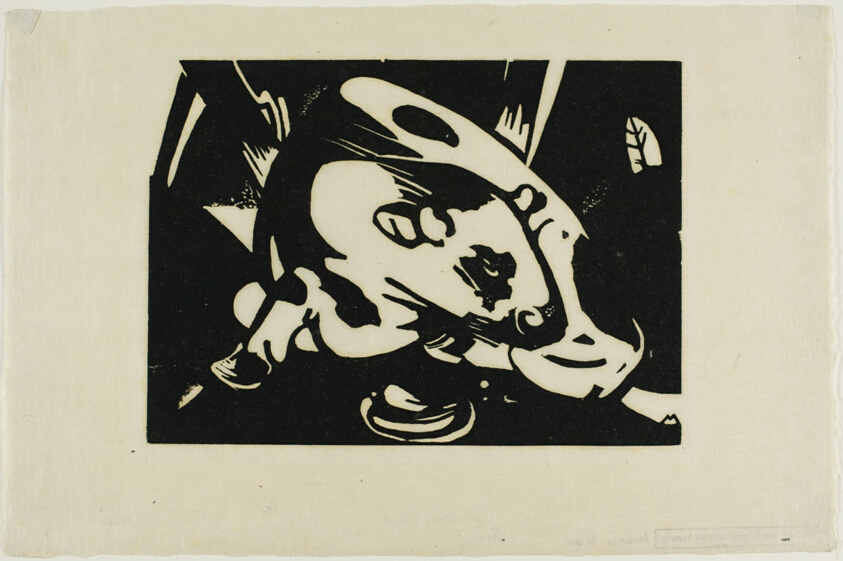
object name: Print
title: The Bull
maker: Franz Marc (German, 1880-1916)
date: 1912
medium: Woodcut on ivory wove Japanese paper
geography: Germany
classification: woodcut; print; prints and drawing